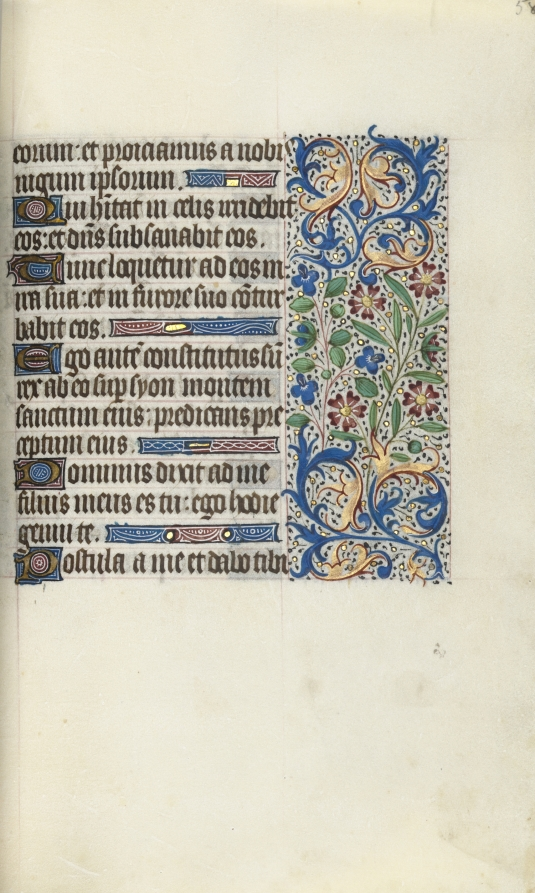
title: Book of Hours (Use of Rouen): fol. 58r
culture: France, Rouen, 15th century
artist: Master of the Geneva Latini (French, active Rouen, 1460–80)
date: c. 1470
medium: ink, tempera, and gold on vellum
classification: Bound Volume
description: In the late 1400s and early 1500s Rouen was an established and important center of book production. The city’s cathedral had a wealthy chapter that spent large sums of money to commission books and to maintain its extensive library. The stationers and booksellers would have likely been concentrated in or near the cathedral precinct. This artist, named after a manuscript now in Geneva, was Rouen’s principal illuminator during the second half of the 1400s.